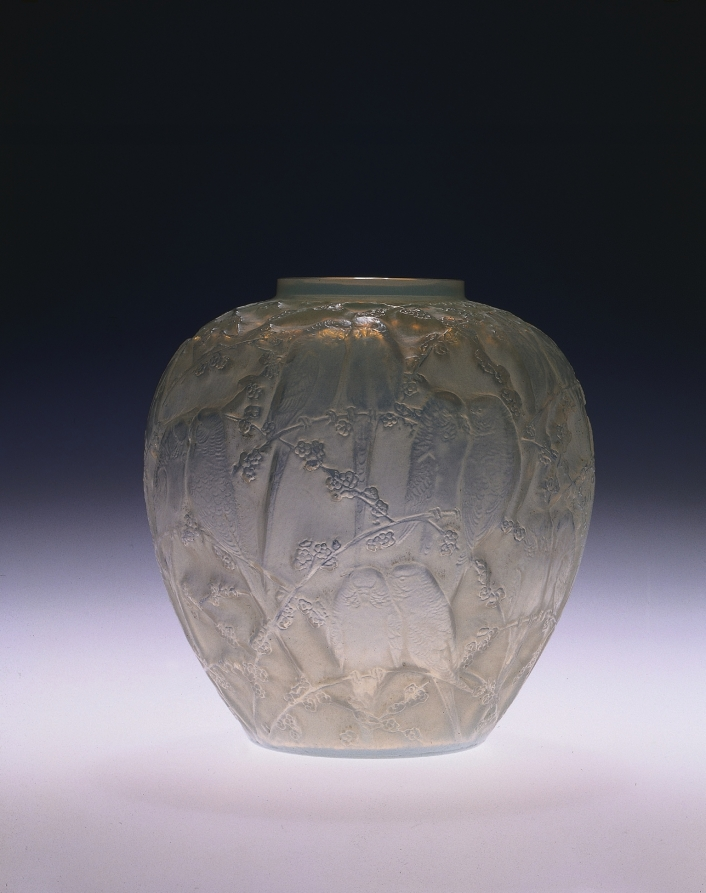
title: Vase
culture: France, 20th century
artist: firm of René Lalique (French, 1860–1945)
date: c. 1930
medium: glass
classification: Glass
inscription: signature from mold on bottom: "R. LALIQUE"; etched on bottom: "FRANCE" and "11594."